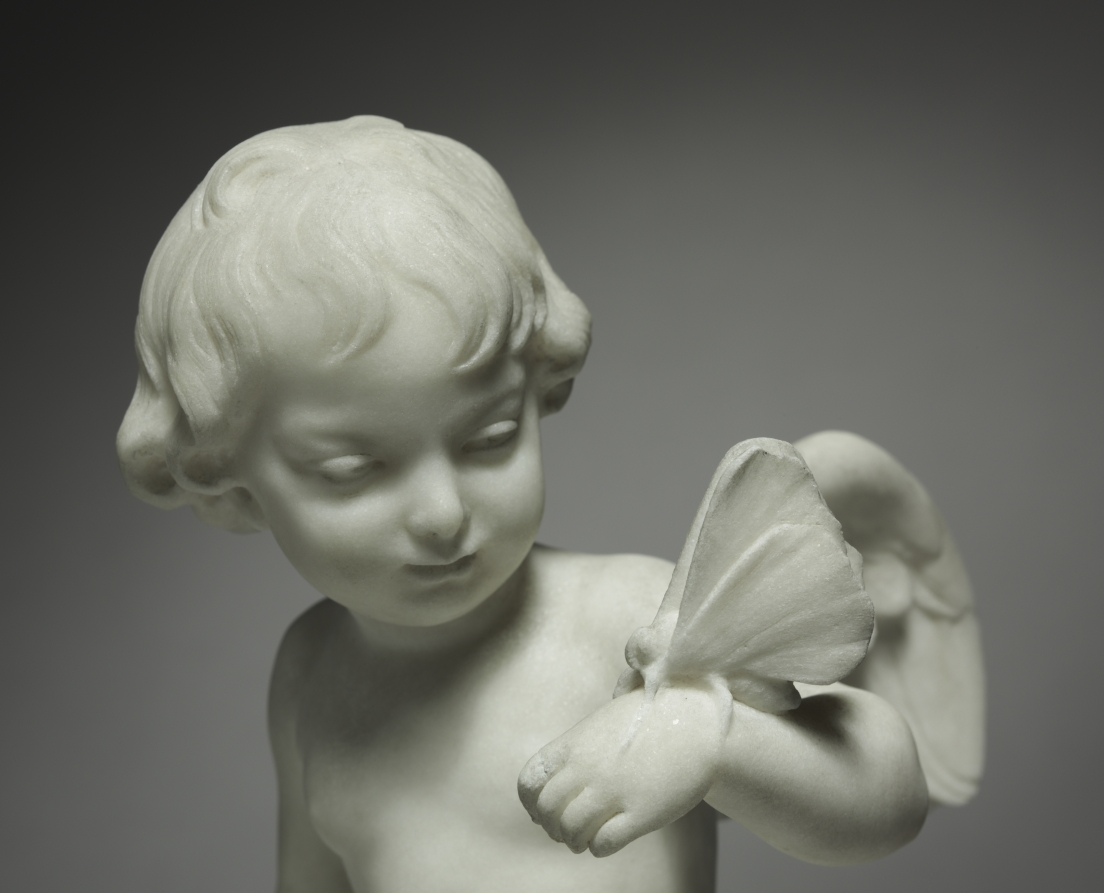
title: Fickle Love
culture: France, 19th century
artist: after Augustin Pajou (French, 1730–1809)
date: 1800s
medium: marble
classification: Sculpture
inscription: Signed Pajou f (fecit) 1787